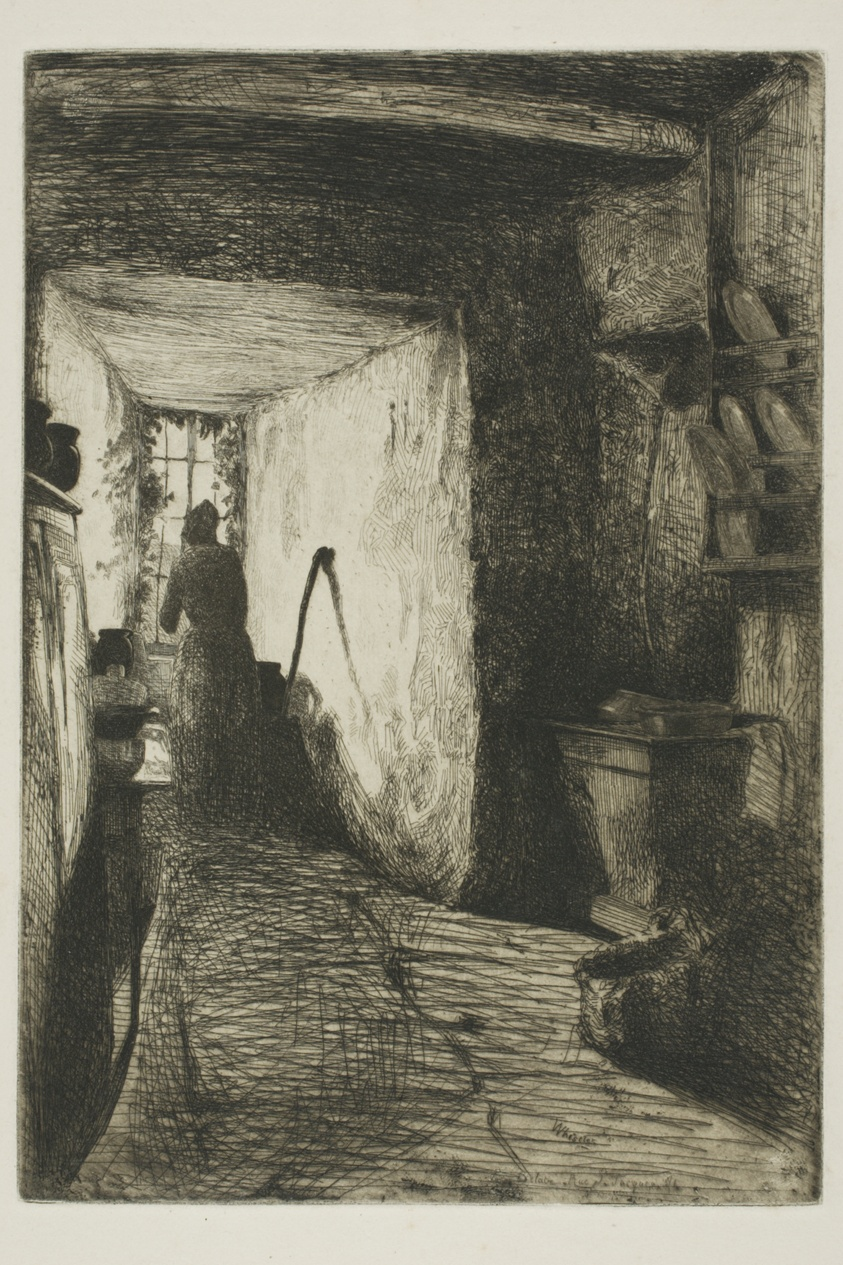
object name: Print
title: The Kitchen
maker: James McNeill Whistler (American, 1834-1903)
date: 1858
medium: Etching in black ink with foul biting on off-white China paper laid down on ivory wove paper (chine collé)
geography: United States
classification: etching; foul biting; print; prints and drawing; paper